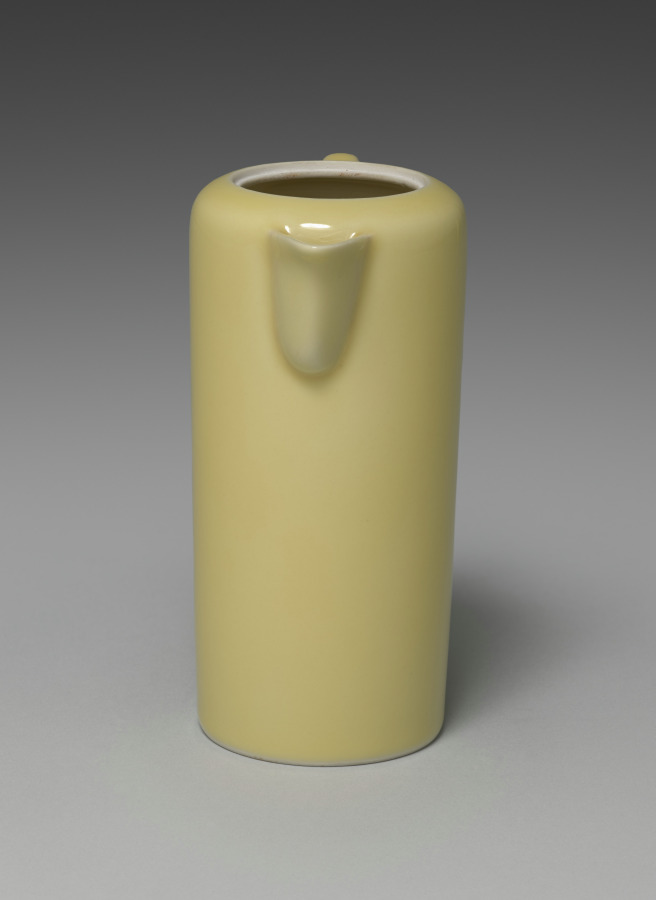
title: Sake Pourer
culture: Japan, Taishō period (1912–26) or Shōwa period (1926–89)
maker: Seifū Yohei IV (Japanese, 1872–1951)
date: 1914–46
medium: Porcelain with yellow glaze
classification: Ceramic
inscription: 清風造 。 【印】 清風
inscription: 成山清風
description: Like his father, Yohei IV also produced works with red or yellow monochrome glazes. His yellow-glazed works include this pair of sake pourers, a set of five drinking cups CMA 2022.217, and a sweets bowl molded into the shape of a chrysanthemum CMA 2022.218.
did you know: The lid's handle is made of bamboo.